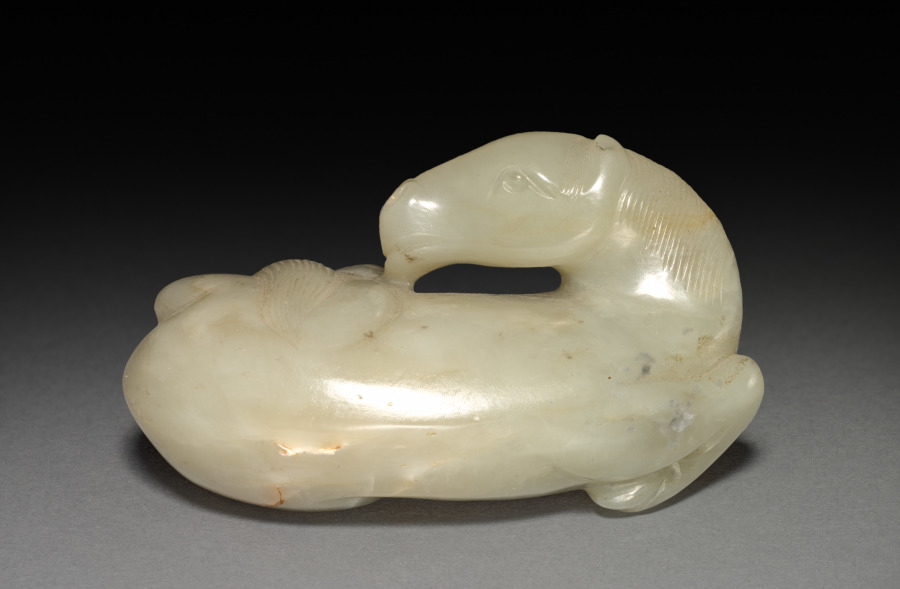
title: Horse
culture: China, Ming dynasty (1368-1644) - Qing dynasty (1644-1911)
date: 1600s or earlier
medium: jade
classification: Jade